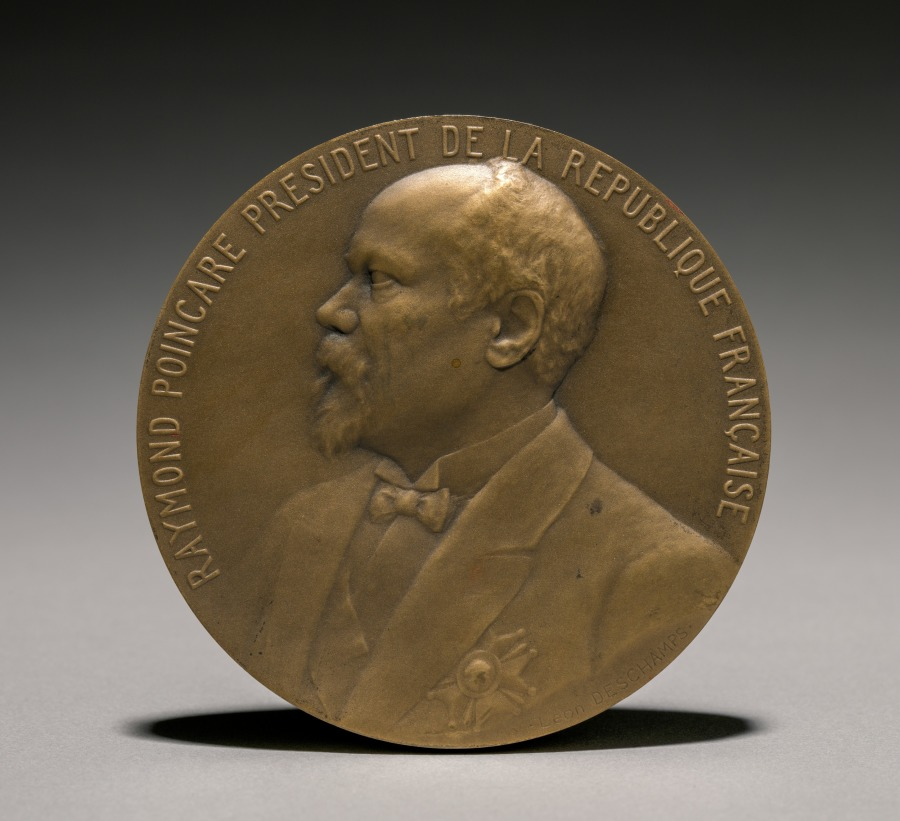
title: Poincarè Medal (obverse)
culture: France, 20th century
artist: Léon Julien Deschamps (French, 1860–1928)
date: 1900s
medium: bronze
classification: Metalwork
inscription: "Raymond Poincarè President de la Republique Francaise."